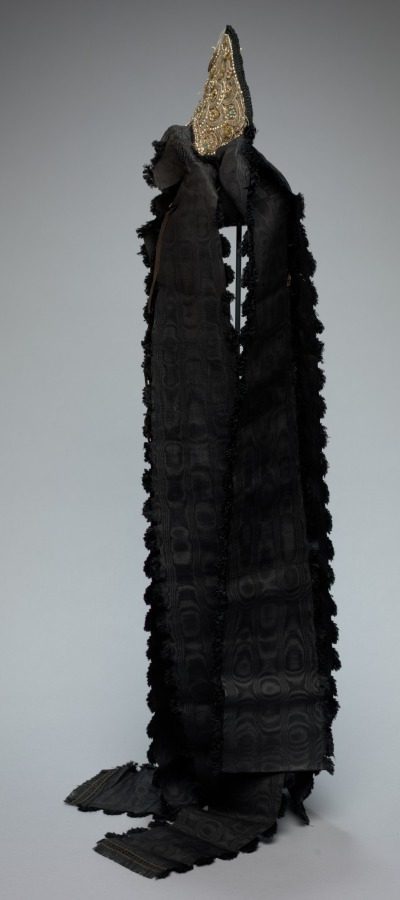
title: Headdress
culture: Germany, Swabia, 18th century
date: 1700s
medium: embroidery, decorated with silver thread, imitation pearls, colored stones, and streamers of moiré ribbon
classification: Garment